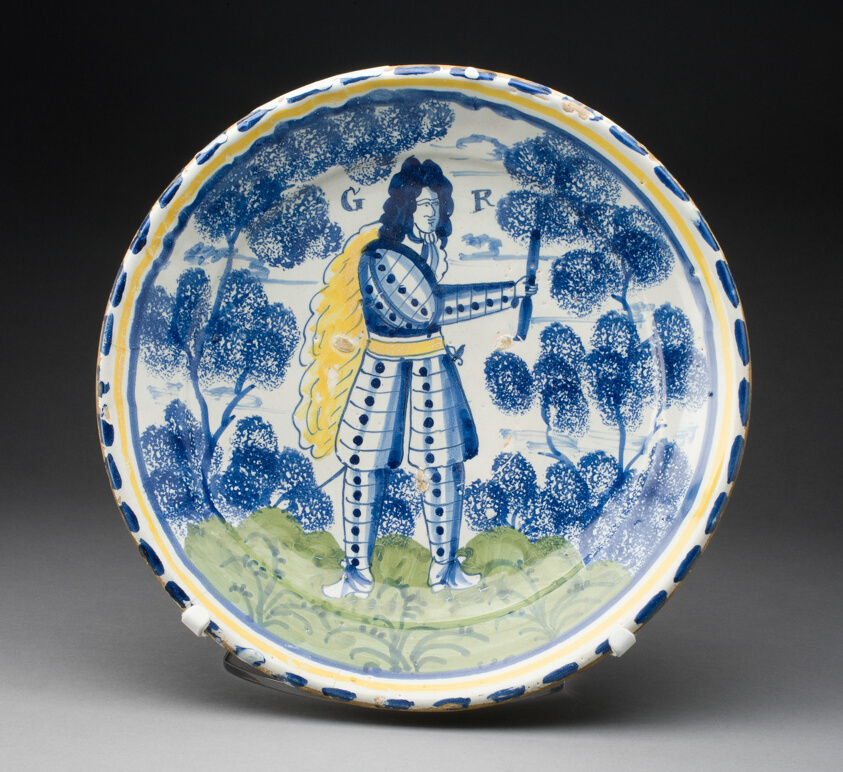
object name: Ceramics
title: Charger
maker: Lambeth, England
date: 1714/27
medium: Tin-glazed earthenware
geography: Lambeth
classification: dish (vessel); earthenware; european decorative arts; tin-glazed ware; ceramics